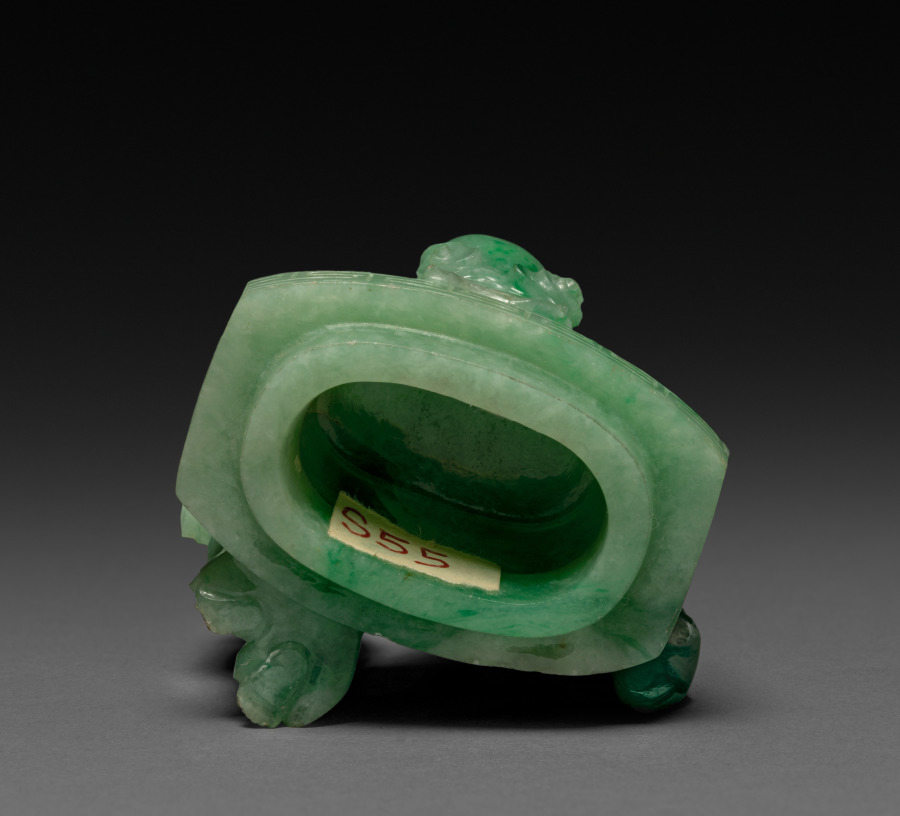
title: Three-Sectional Altar Group: Cylindrical Carving with Phoenix (lid)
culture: China, Qing dynasty (1644-1911)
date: 1644–1911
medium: jade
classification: Jade